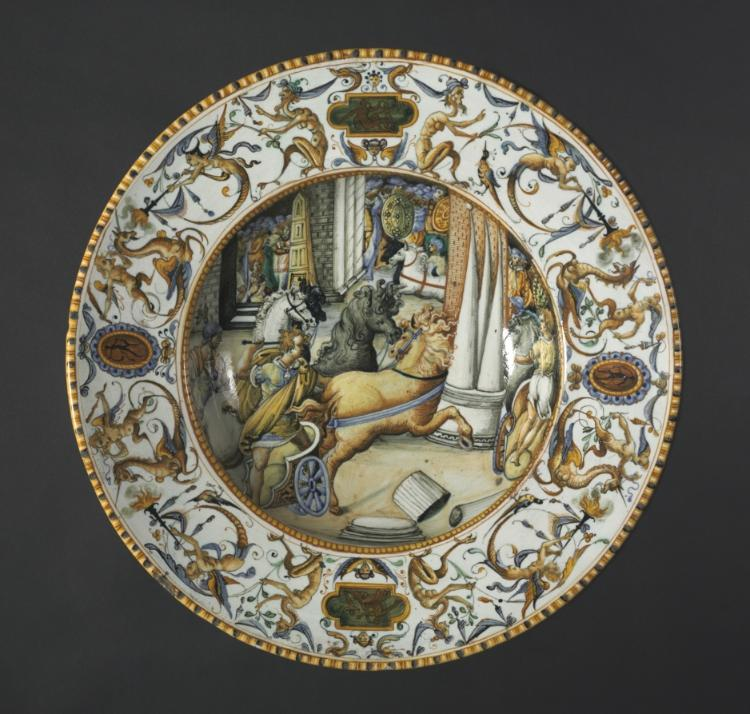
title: Charger Depicting a Chariot Race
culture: Italy, Urbino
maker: circle of Fontana Family (Italian)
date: c. 1575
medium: tin-glazed earthenware (maiolica)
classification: Ceramic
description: During the Renaissance, an understanding of classical antiquity was perceived to be a sign of social, intellectual, and economic distinction. Scenes from Greco-Roman mythology were prominently featured on maiolica, covering the surface in a style called istoriato (decorated with stories).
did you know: The creatures along the rim of this plate are loosely based on the figures discovered on the walls of Roman ruins a century before.